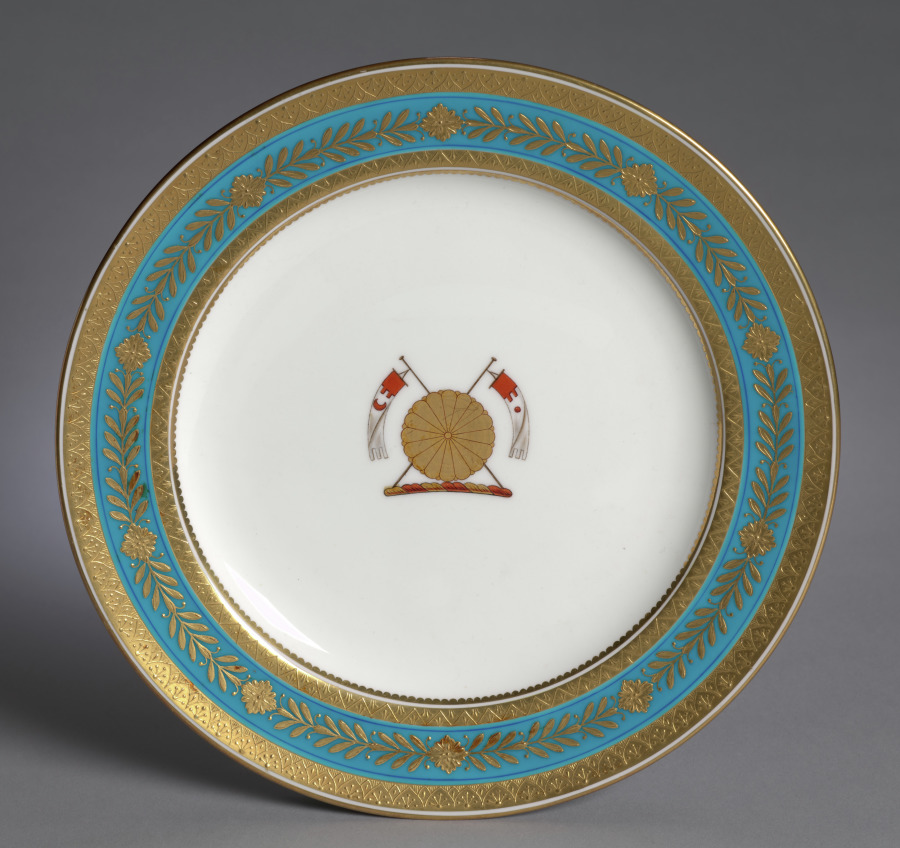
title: Plate made for Emperor Meiji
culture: England, 19th century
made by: Minton Pottery and Porcelain Factory (British)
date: c. 1875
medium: porcelain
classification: Ceramic